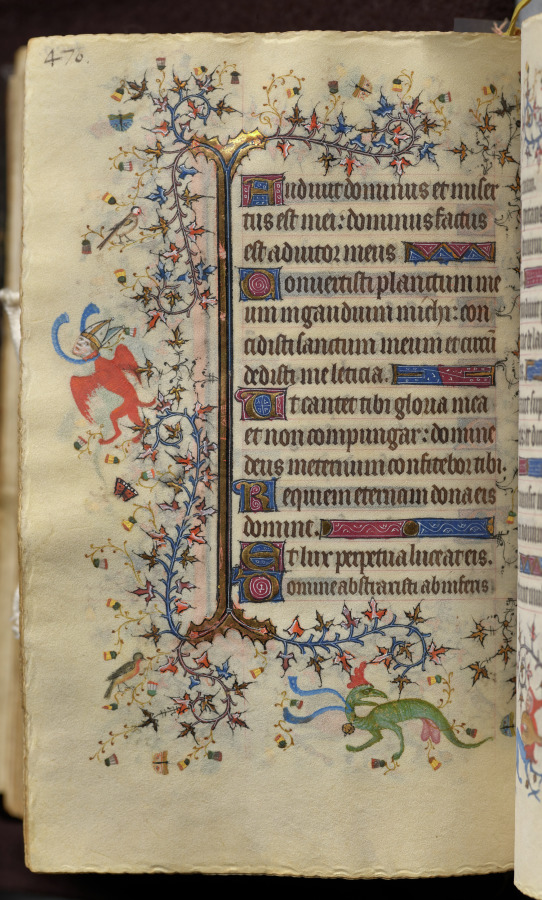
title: Hours of Charles the Noble, King of Navarre (1361-1425): fol. 229v, Text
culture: France, Paris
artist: Master of the Brussels Initials and Associates (French)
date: c. 1405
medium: ink, tempera, and gold on vellum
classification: Bound Volume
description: This precious volume was obviously highly prized by its owner, the French-born King of Navarre, who had his coat of arms painted on no less than twenty folios. Rather than directly commissioning this manuscript from a specific workshop, it seems that Charles the Noble acquired his book of hours -- perhaps ready-made for the luxury market -- while on a trip to Paris in 1404-05. A collaborative effort, six painting styles are evidenced within the pages of this codex, those of two Italians, two Frenchmen, and two Netherlanders. The painter who was responsible for the planning and decoration of the book, and who produced seventeen of the large miniatures, was a Bolognese artist known as the Master of the Brussels Initials. His principal assistant, responsible for most of the borders, was a Florentine who signed his name "Zecho" da Firenze on folio 208 verso.